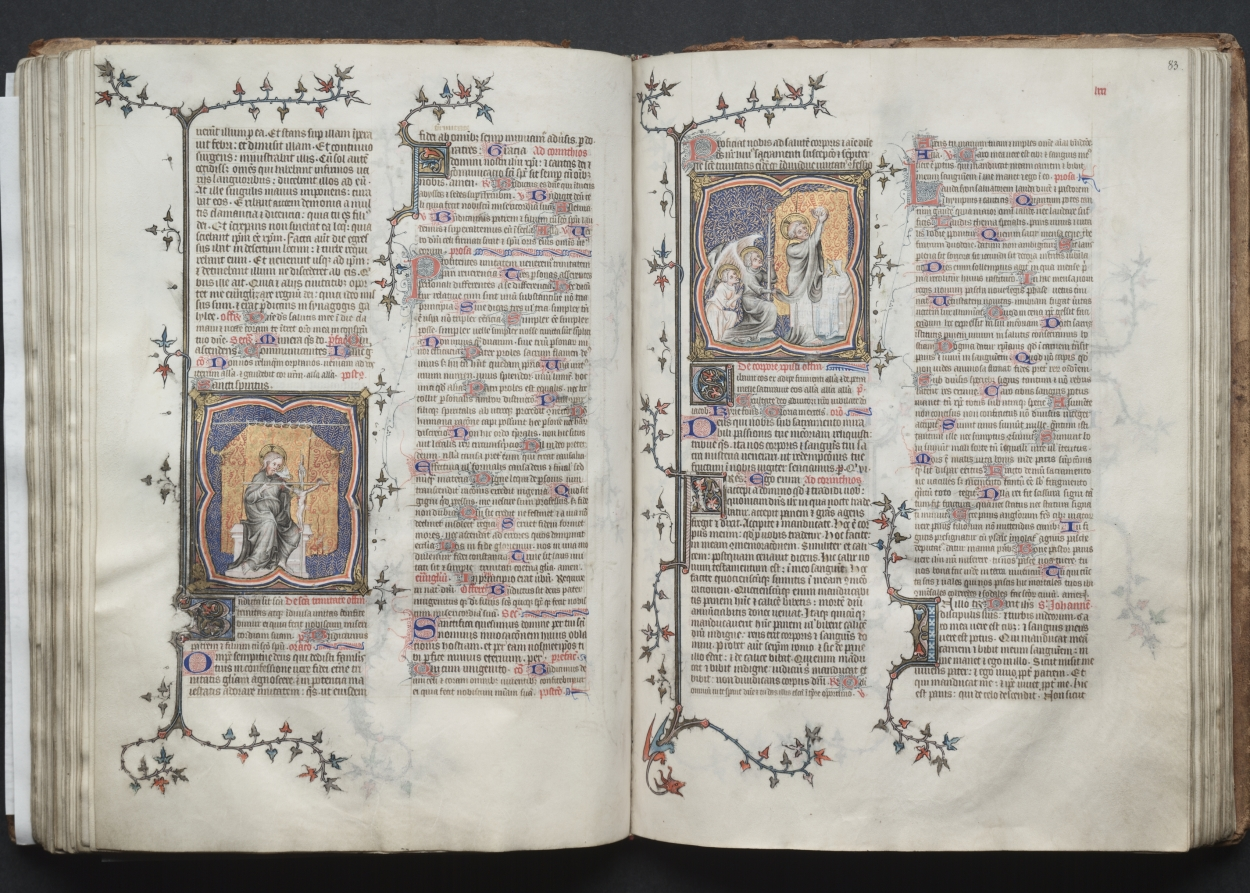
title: The Gotha Missal: Fol. 82v, The Trinity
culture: France, Paris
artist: Master of the Boqueteaux (French)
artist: and Workshop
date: c. 1375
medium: ink, tempera, and gold on vellum; blind-tooled leather binding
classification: Bound Volume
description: The style and quality of this manuscript's decoration is typical of deluxe Parisian books made for aristocratic or royal patrons. Most of the book's decoration appears to be the work of the Master of the Boqueteaux, an artist active at the court of King Charles V (died 1380). His style was apparently shared by a number of book illuminators working in and around Paris. It is very possible that the Gotha Missal belonged to Charles V, but is not provable because the manuscript has no royal portraits and lacks a colophon. Given the book's magnificent decoration, however, it would seem that it was produced for a Valois prince, if not for the king himself. The manuscript receives its name from the German dukes of Gotha, its later owners.